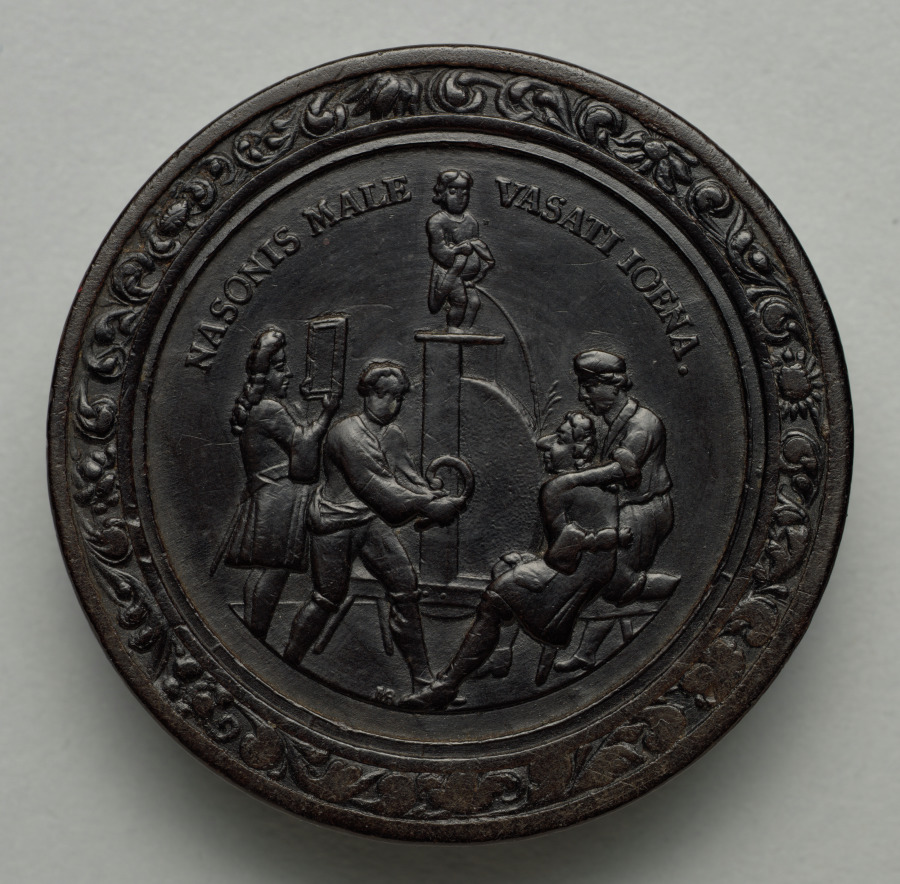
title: Gaming Piece (obverse)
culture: Germany, late 17th-early 18th Century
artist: Martin Brunner (German, 1659–1725)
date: c.1700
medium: wood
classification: Furniture and woodwork